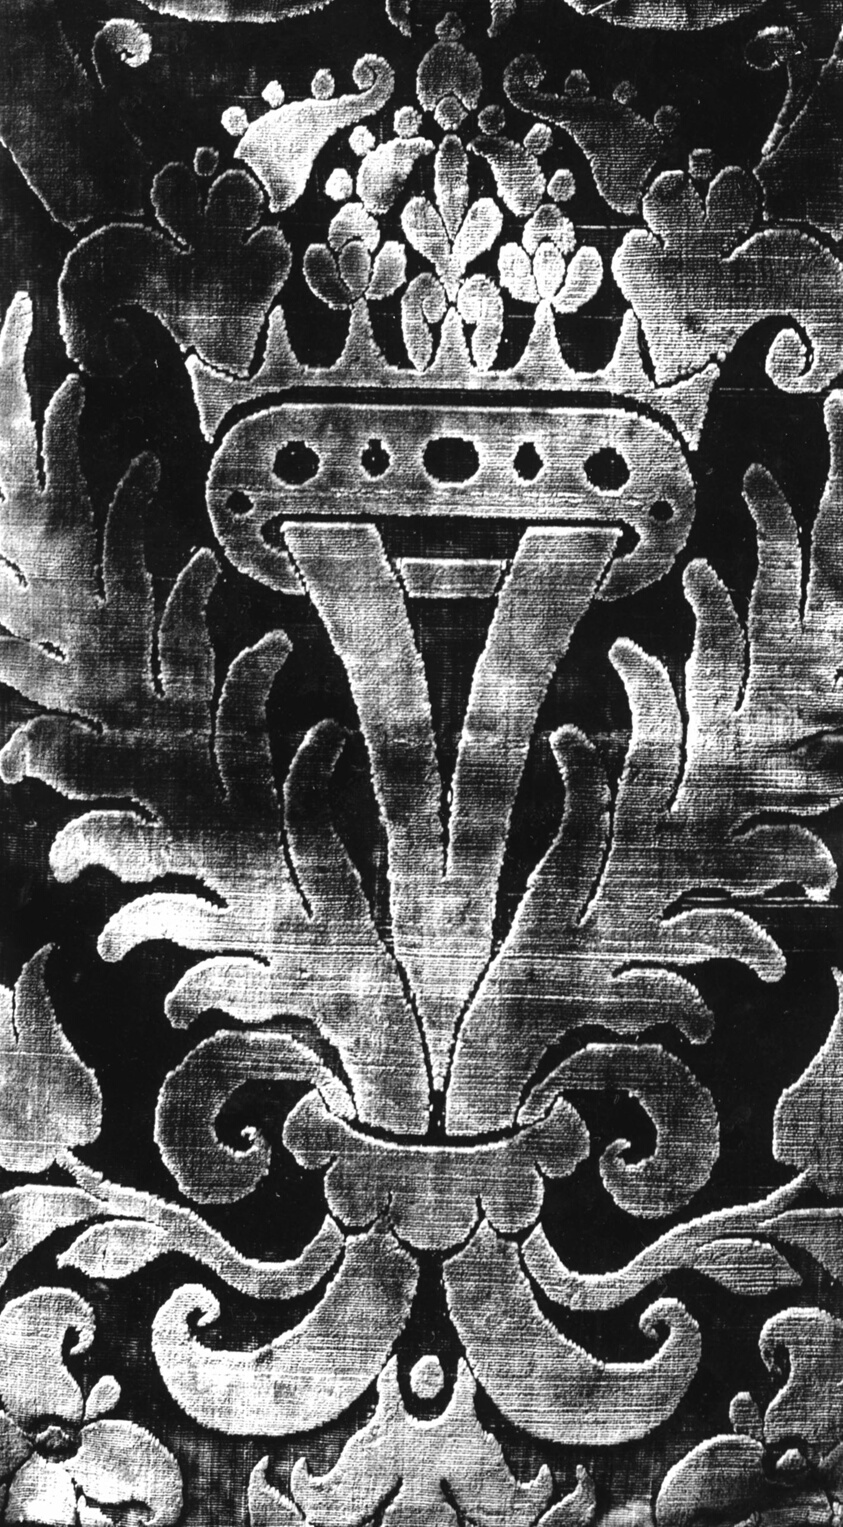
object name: Textile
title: Fragment (Dress Fabric)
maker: Italy, Venice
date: 1500/50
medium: Silk, warp-float faced 3:1 broken warp chevron twill weave with supplementary pile warps forming cut pile-on-pile solid velvet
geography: Venice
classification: textile; weaving - velvet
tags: coat of arms, royalty